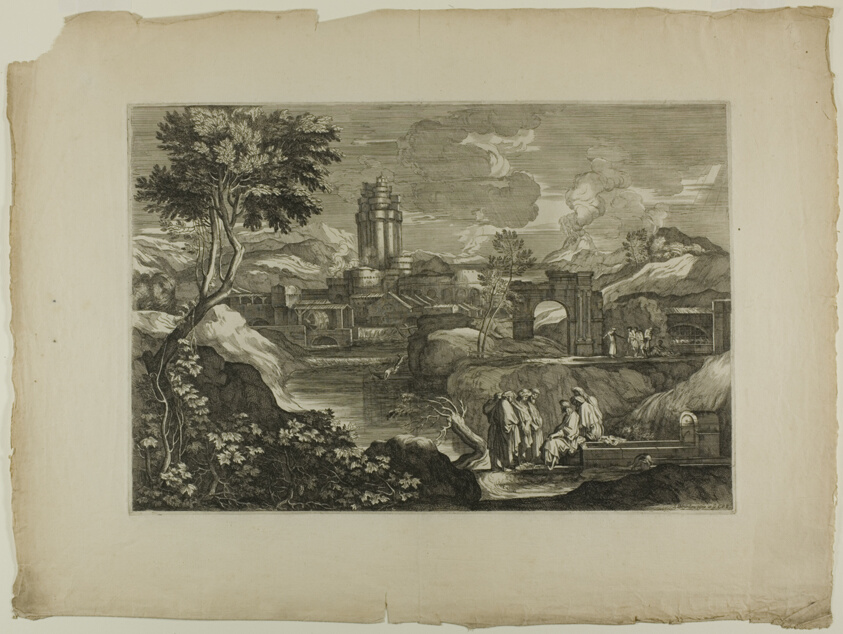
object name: Print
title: Joseph in Egypt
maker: Sébastien Bourdon (French, 1616-1671)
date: 1668–71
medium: Etching on ivory laid paper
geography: France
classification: etching; print; prints and drawing